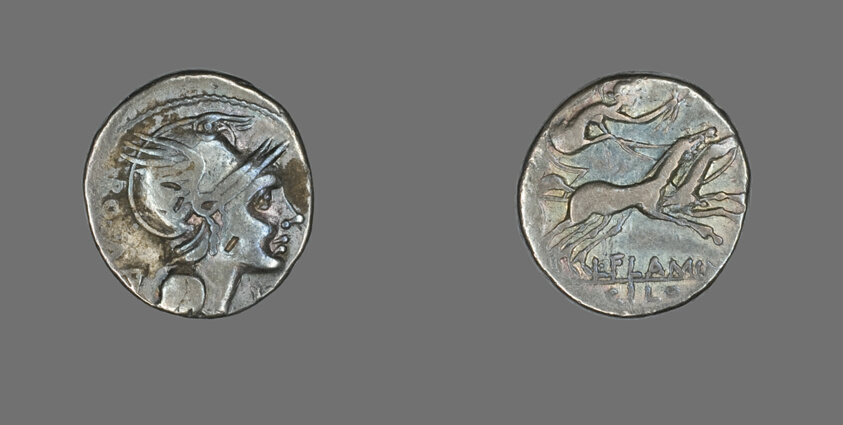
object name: Coin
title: Denarius (Coin) Depicting the Goddess Roma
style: roman (ancient, style or period), ancient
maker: Roman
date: 109-108 BCE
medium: Silver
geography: Roman Empire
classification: coin; ancient art